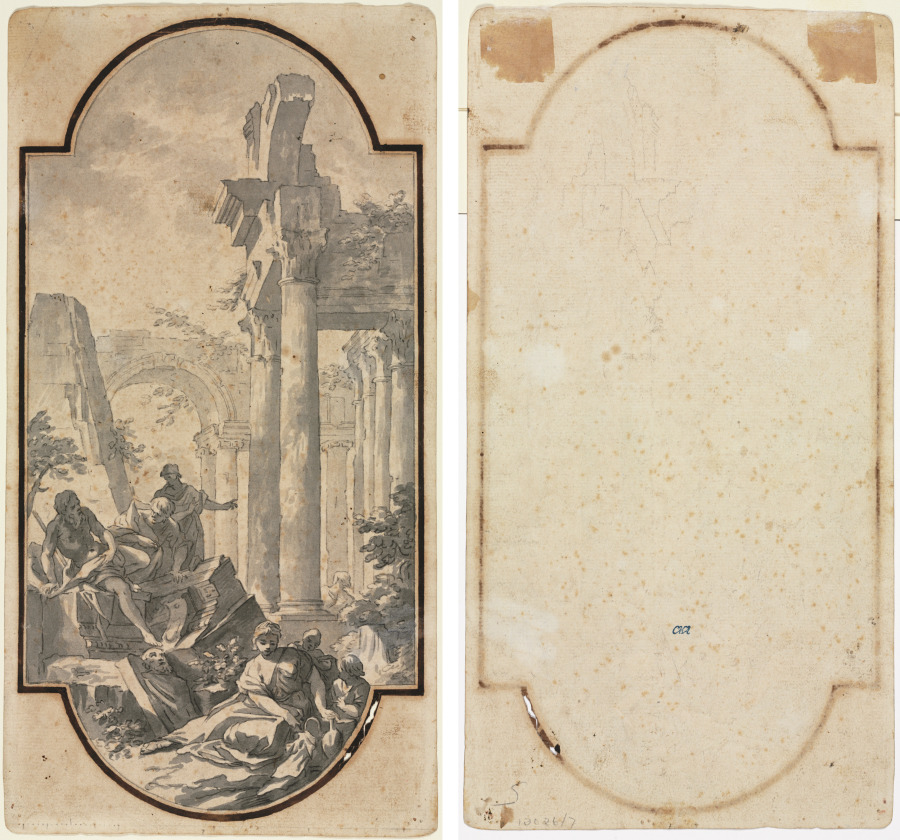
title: Figures Near the Ruins of a Corinthian Temple (recto); Fragment of an Arch (tracing from recto) (verso)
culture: Italy, 18th century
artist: Andrea Locatelli (Italian, 1695–1741)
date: first half 1700s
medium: brush and black and gray wash, over traces of black chalk; framing lines in black chalk, and brown ink (iron gall)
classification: Drawing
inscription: verso: lower left, in graphite: 5 [upside down]